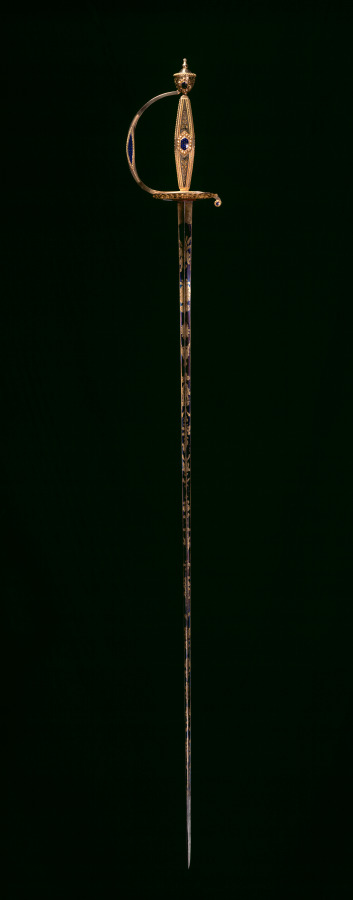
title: Small-Sword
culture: Switzerland, Geneva(?) (blade: Germany, Solingen, early 18th c.), late 18th Century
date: c. 1790–1800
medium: hilt: gold with blue translucent enamel; blade: etched, blued and gilded steel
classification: Arms and Armor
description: This example shows the small-sword at its latest and most refined stage of development. Though highly reflective of French taste, it was probably fashioned in a Swiss workshop under French influence or by a French craftsman working in Switzerland. Worn publicly as an emblem of social rank, this sword was likely custom-made for an affluent individual to use on formal or court occasions. So-called because of its short blade, the small-sword emerged as the light and quick weapon of choice for aristocratic civilians during the 1700s. Such a sword was traditionally suspended at about mid-thigh from the left side of a belt, the hilt exposed through the opening of the gentleman's coat. Highly visible, the hilt invited lavish decoration through precious materials such as gold and enamels, as seen here. Considered a type of masculine jewelry at that time, small-swords featured a variety of hilt styles that went in and out of fashion. Many were decorated to match personal costume, and jewelers worked on the finest small-swords of the day.